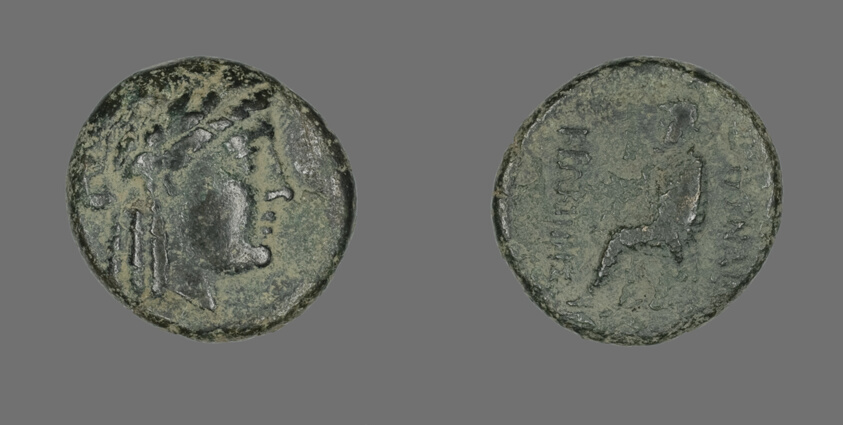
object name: Coin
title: Coin Depicting the God Apollo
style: greek, ancient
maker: Greek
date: 2nd century BCE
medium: Bronze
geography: Ancient Greece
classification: coin; ancient art